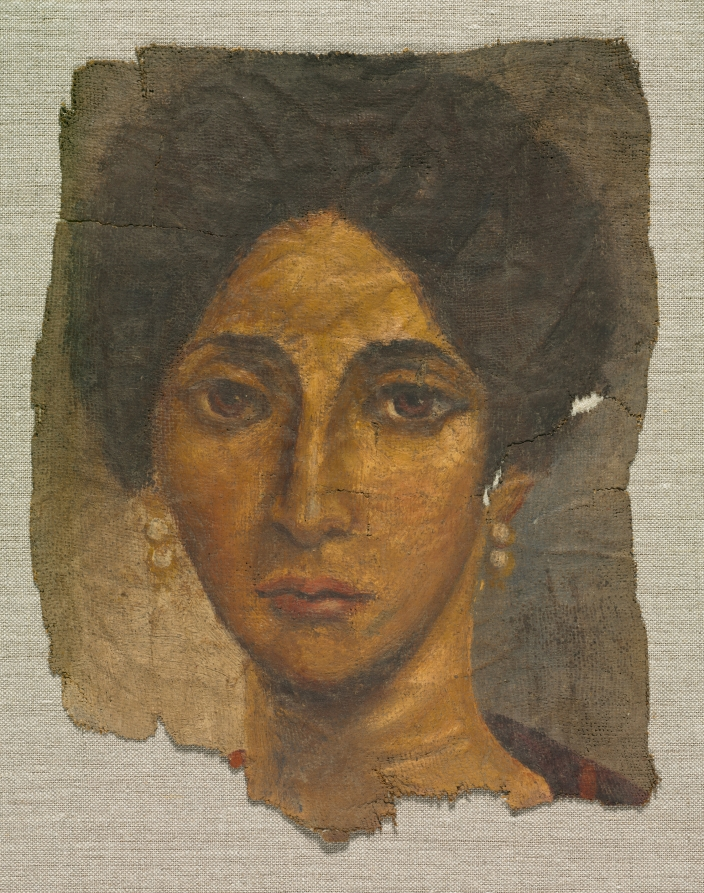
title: Funerary Portrait of a Woman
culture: Egypt, Roman Empire, Antonine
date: c. 138–92 CE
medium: encaustic on linen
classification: Painting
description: So-called mummy portraits were apparently painted during the owners' lives and hung in their homes. At the time of the owner's death, the portrait was taken down, cut from its frame, and trimmed to fit the deceased's mummy, to which it was bound. It was at that time also that the gilding on the center painting was added.